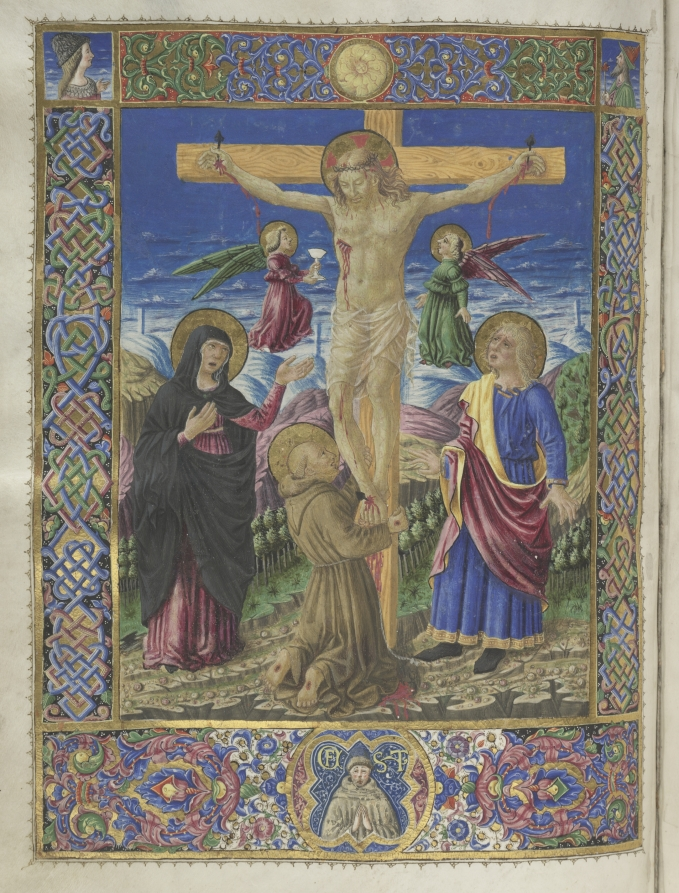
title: Missale: Fol. 185v: Crucifixion with borders (full page)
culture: Italy, Perugia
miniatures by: Bartolommeo Caporali (Italian, c. 1420–1503)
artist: assisted by Giapeco Caporali (Italian, d. 1478)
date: 1469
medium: ink, tempera and burnished gold on vellum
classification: Bound Volume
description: This illuminated manuscript once served as a liturgical service book used on the high altar by a priest for the Mass. The missal’s colophon (inscription) identifies the book as belonging to the church of San Francesco in Montone, a convent of Franciscan friars, and gives its date of completion as October 4, 1469. Here, the volume is opened to its masterpiece, two pages that introduce the canon of the Mass, the most solemn part of the celebration during which the priest consecrates the Eucharistic bread and wine. The missal receives its name from the two Perugian artists who collaborated to illuminate its pages. Here, the Calvary scene featuring the crucified Christ flanked by the Virgin and Saint John is the work of Bartolomeo Caporali, and the marginal decoration and the facing page are likely the work of his brother, Giapeco. Saint Francis’s appearance at the foot of the cross attests to the missal’s Franciscan use and affiliation.